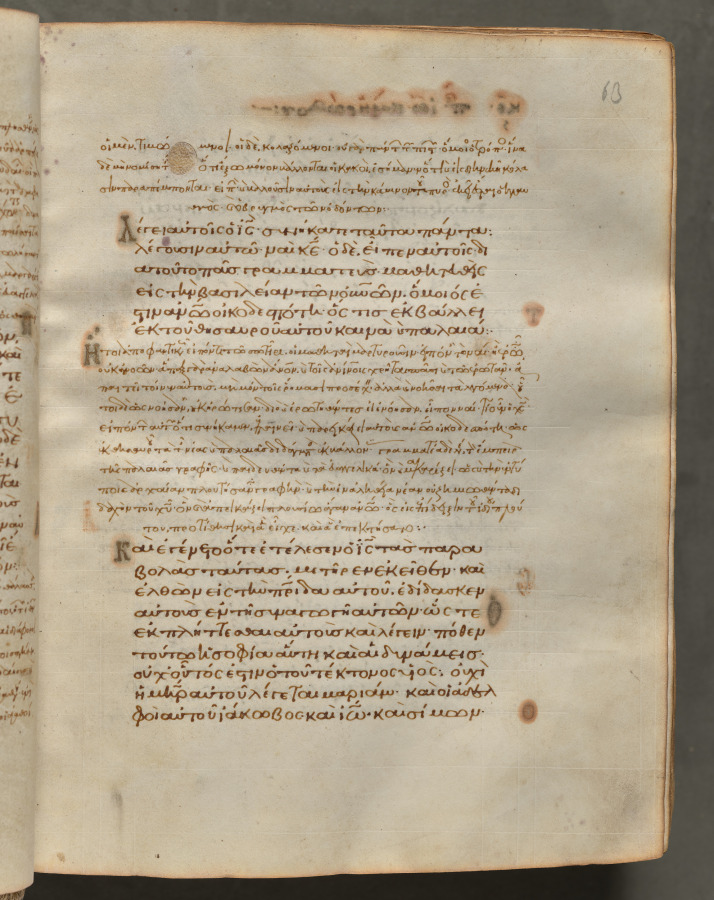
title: Text, folio 63 (recto), from a Gospel Book with Commentaries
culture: Byzantium, Constantinople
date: c. 1000–1100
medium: ink, tempera, and gold on vellum; leather binding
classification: Bound Volume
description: Each of the four gospels in this book opens on a page with brilliantly illuminated borders depicting the author of the text as well as birds-principally peacocks, symbols of the immortality of the soul-and fountains, representing the fountain of life and the salvation of the soul. This volume consists of 428 leaves with texts in Greek. Its level of sophistication suggests that it was probably written and decorated in a monastery in Constantinople.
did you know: Gospel Books were carried in procession through Byzantine churches.